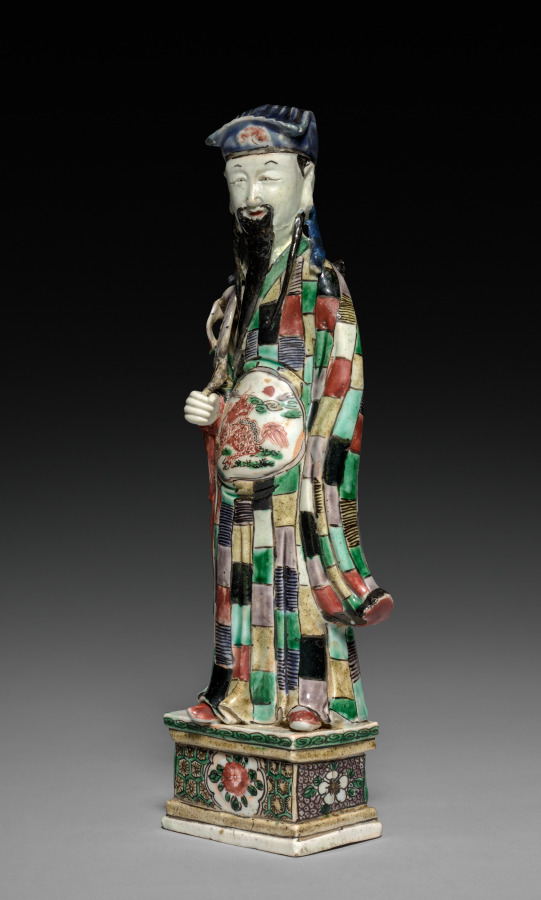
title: Daoist Immortal Zhongli Quan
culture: China, Jiangxi province, Jingdezhen kilns, Qing dynasty (1644-1911), Kangxi reign (1662-1722)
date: 1662–1722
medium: porcelain with famille verte overglaze enamel decoration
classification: Ceramic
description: This porcelain figure represents Zhongli Quan as a scholar. He is wearing a scholar’s hat and carries a scroll on his back. He holds a fan that, according to legend, could bring the dead to life. Thus, he also bears the auspicious meaning of longevity. On his bare belly, the potter painted a qilin, a mythical auspicious creature that turns his head to the sun. The same design in different colors also decorates his back.